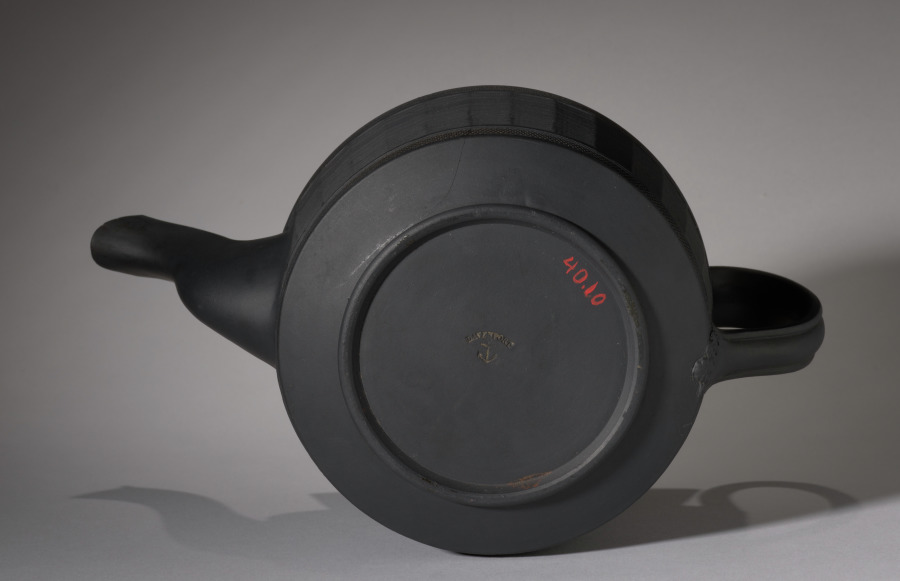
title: Teapot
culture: England, Staffordshire, 19th century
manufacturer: Davenport Pottery and Porcelain Factory (British)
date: 1800s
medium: black basalt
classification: Ceramic